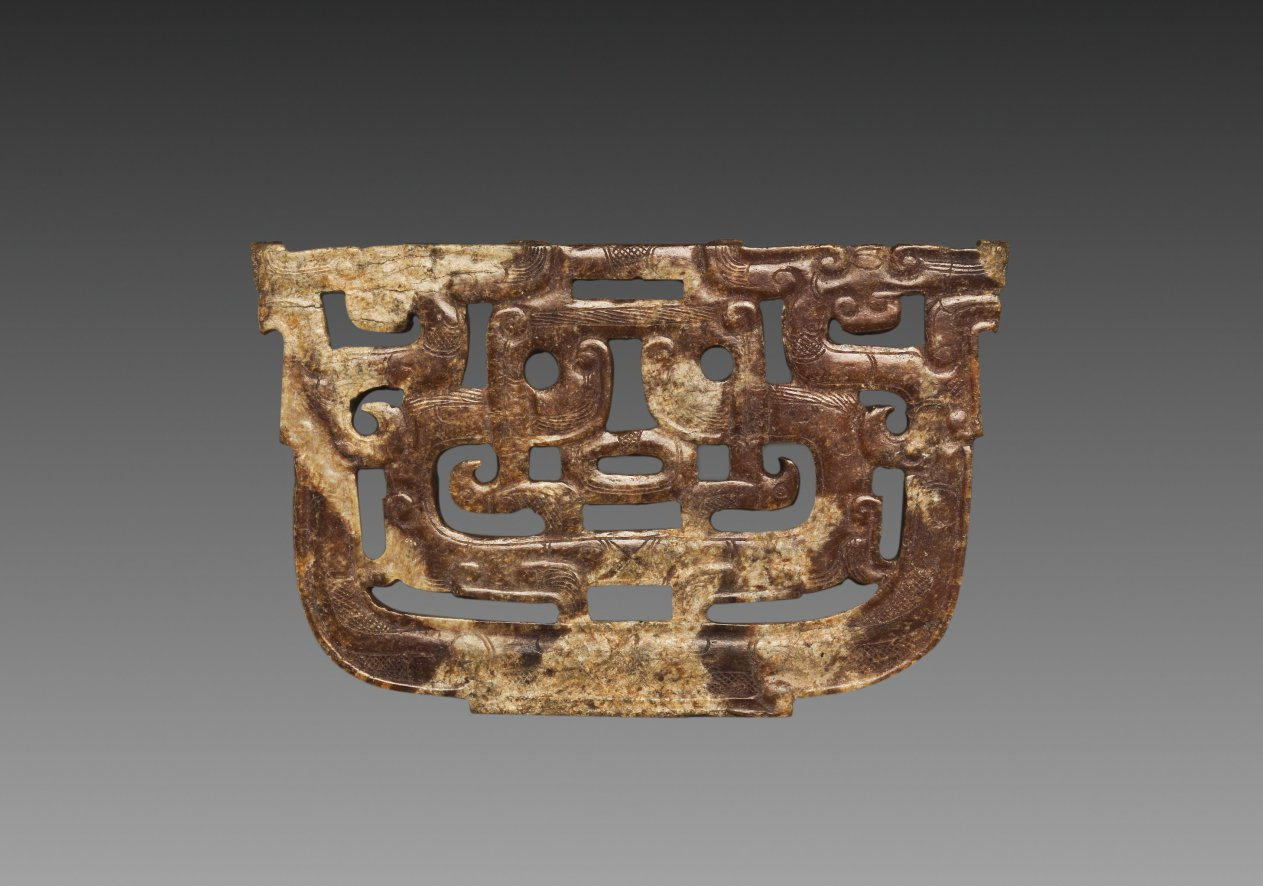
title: Plaque with Openwork Interlaced Dragons and Birds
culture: China, Warring States period (475–221 BCE)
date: 475–221 BCE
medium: jade (nephrite)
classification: Jade